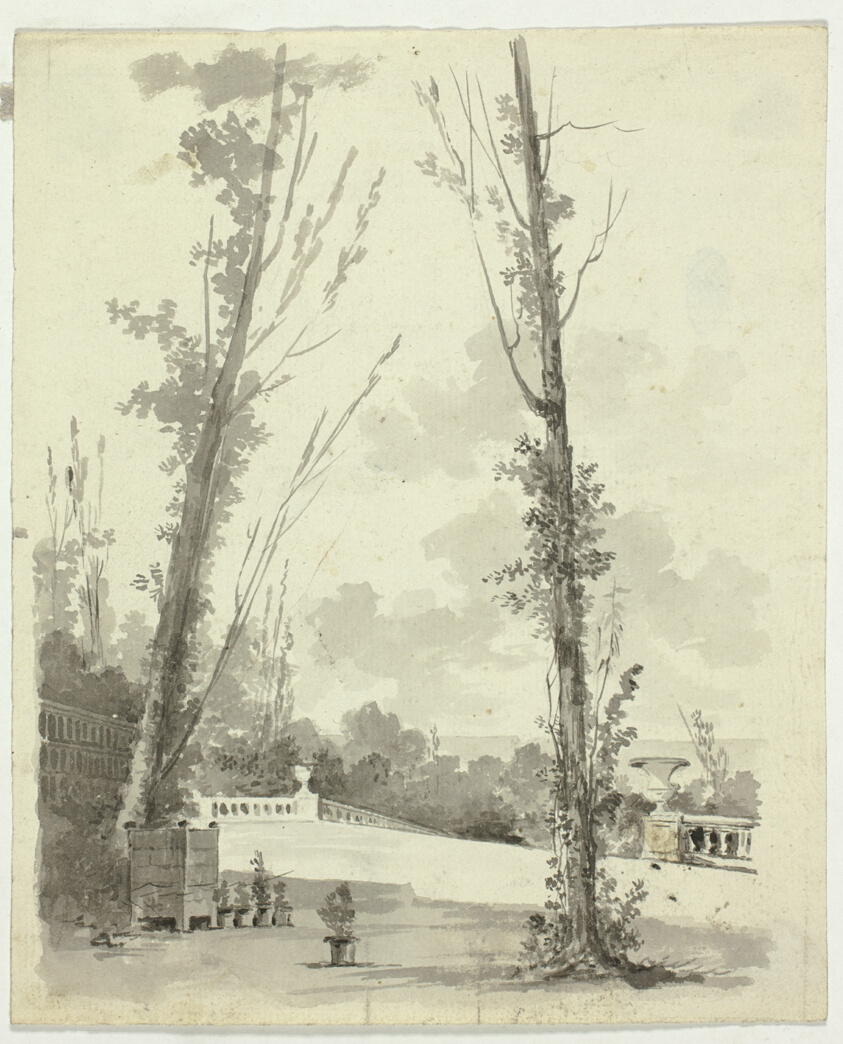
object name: Drawing and Watercolor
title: View of the Park at Versailles: Two Poplar Trees with Balustraded Walk in Background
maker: Pierre Antoine Mongin (French, 1761/62-1824/27)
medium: Brush and black and gray wash, over graphite, on ivory laid paper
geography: France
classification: ink or chalk wash; drawings (visual works); prints and drawing